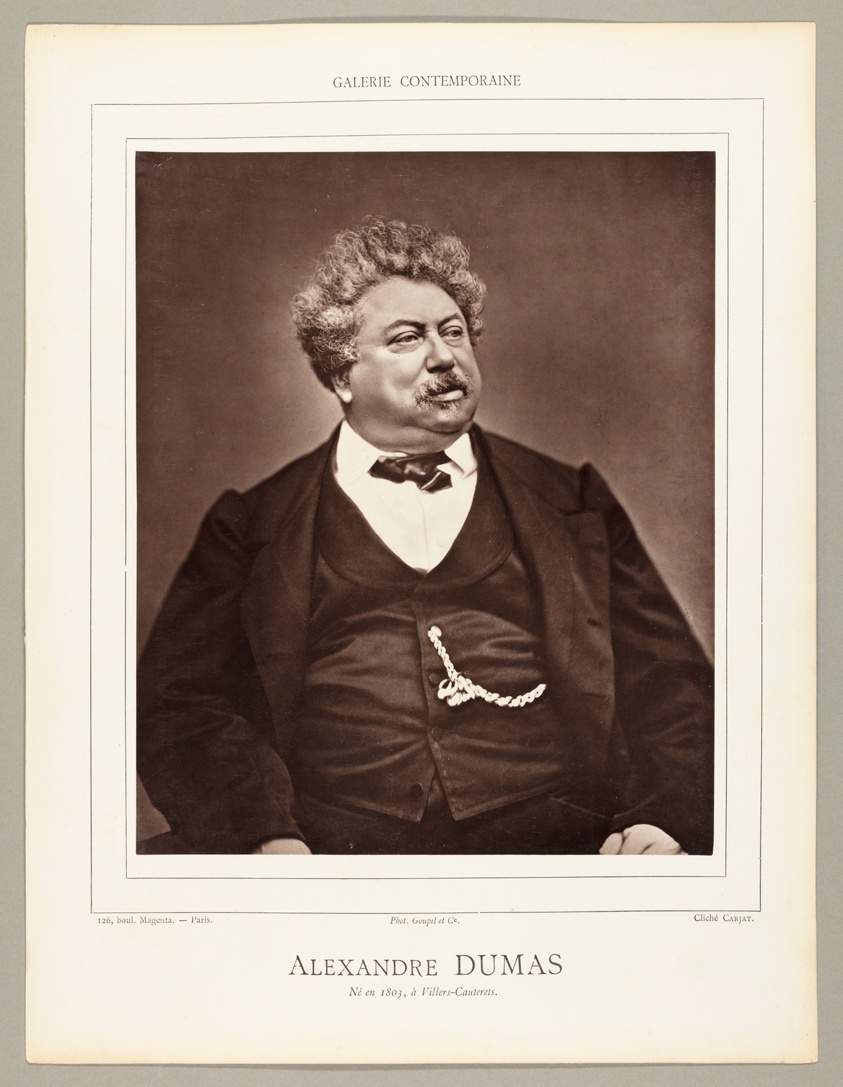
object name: Photograph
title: Alexandre Dumas (French novelist and playwright, 1802-1870)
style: 19th century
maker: Étienne Carjat; French, 1828–1906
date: c. 1876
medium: Woodburytype, from the periodical “Galerie Contemporaine Littéraire, Artistique” (1878), volume 5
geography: France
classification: woodburytype; photomechanical process; photography; photograph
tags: Collected by Hugh Edwards, Contemporaine Littéraire